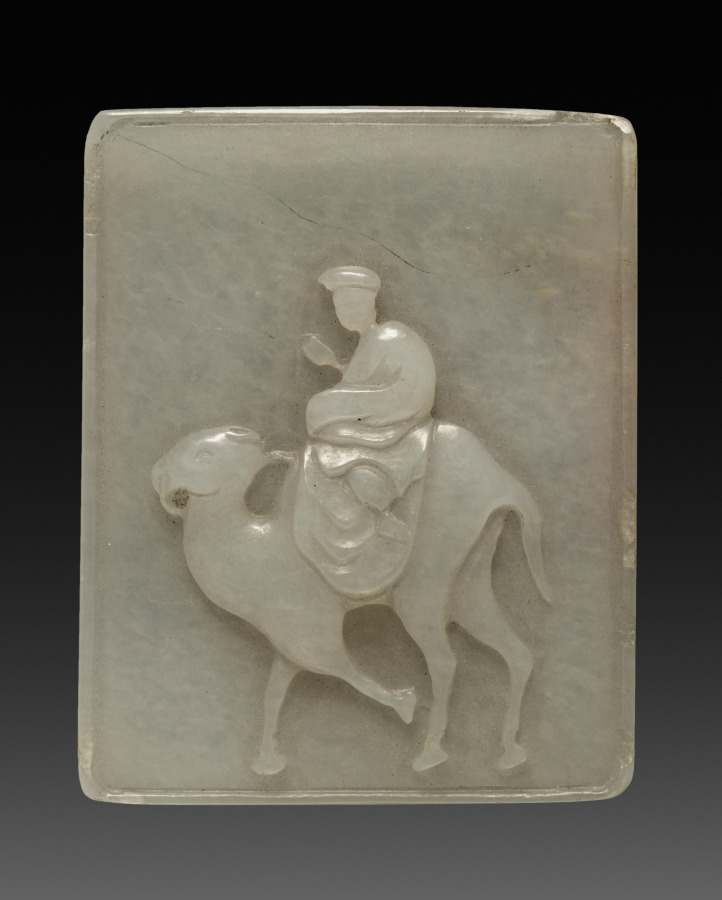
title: Seal Box (lid)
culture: China, Qing dynasty (1644-1911)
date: 1644–1700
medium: jade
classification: Jade